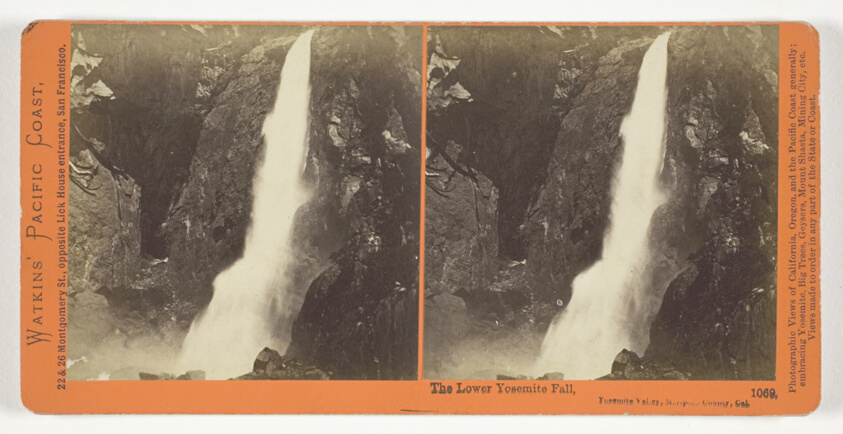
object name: Photograph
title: The Lower Yosemite Fall, Yosemite Valley, Mariposa County, Cal., No. 1069 from the series "Watkins' Pacific Coast"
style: 19th century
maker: Carleton E. Watkins; American, 1829-1916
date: 1861/76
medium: Albumen print, stereo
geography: United States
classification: stereograph (albumen); albumen silver print; photographic process; photography; photograph